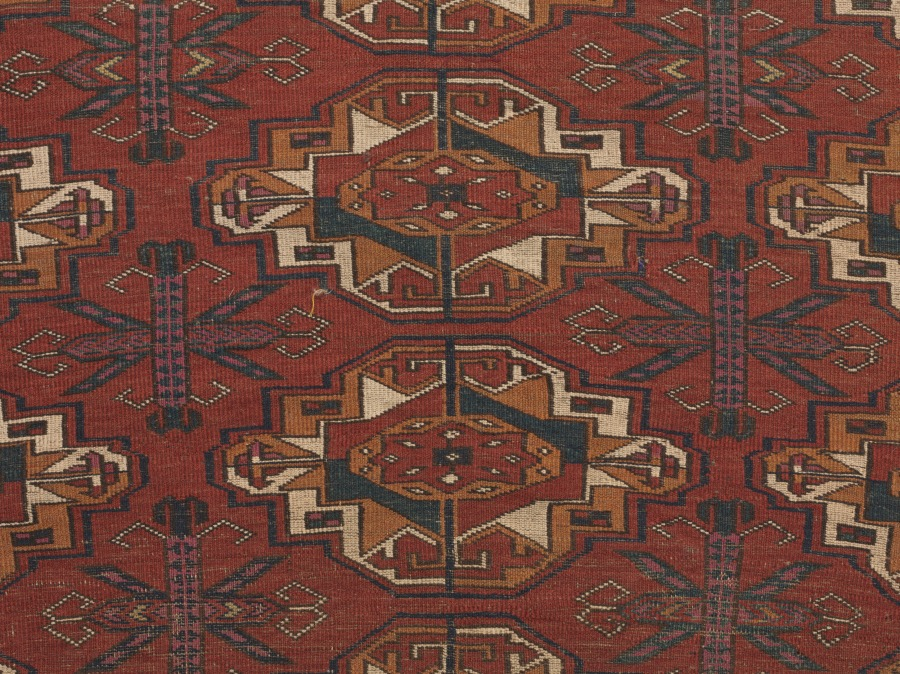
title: Turkmen Bag Face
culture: Turkmenistan, Saryk tribe of the Turkmen people (1850-1899), 19th century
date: 1800s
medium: Wool, silk, cotton; 252 symmetrical rug knots per square inch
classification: Textile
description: The front of this bag, called a bag face, displays the distinctive hallmarks of the Saryk tribe. The main guls, or lobed motifs, are subdivided in quadrants and alternate with angular minor guls in staggered rows. It is the oldest known weaving of the Saryk tribe, with a soft red ground color and white cotton and magenta silk pile highlights. Essential storage containers, bags were suspended from wall trellises inside tents and transported by pack animals during seasonal migrations. Bags were woven in one piece with pile on the upper part for the front face and plain weave on the lower part for the back face, and then folded and sewn along both sides.